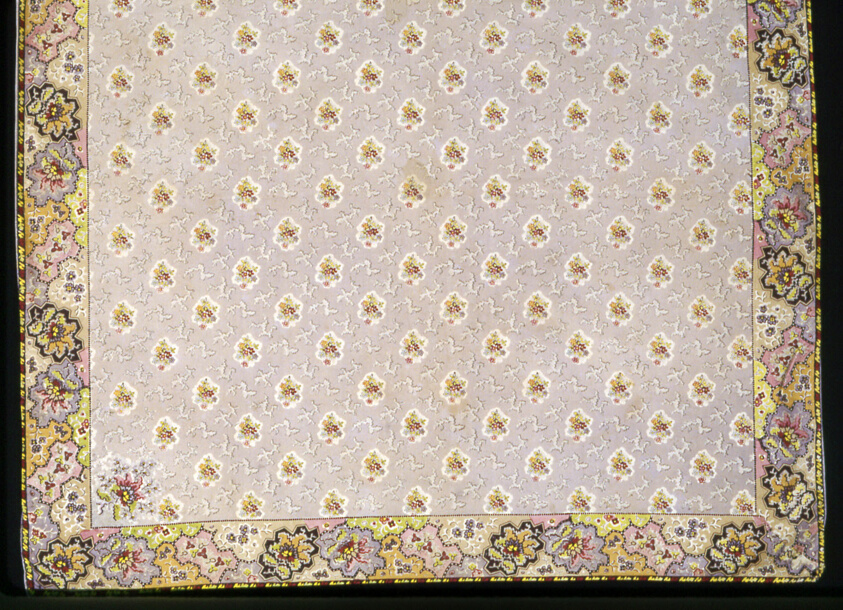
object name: Textile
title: Handkerchief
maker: France, Alsace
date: 19th century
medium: Cotton, plain weave; printed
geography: France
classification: textile; weaving - printed; accessories (object genre)